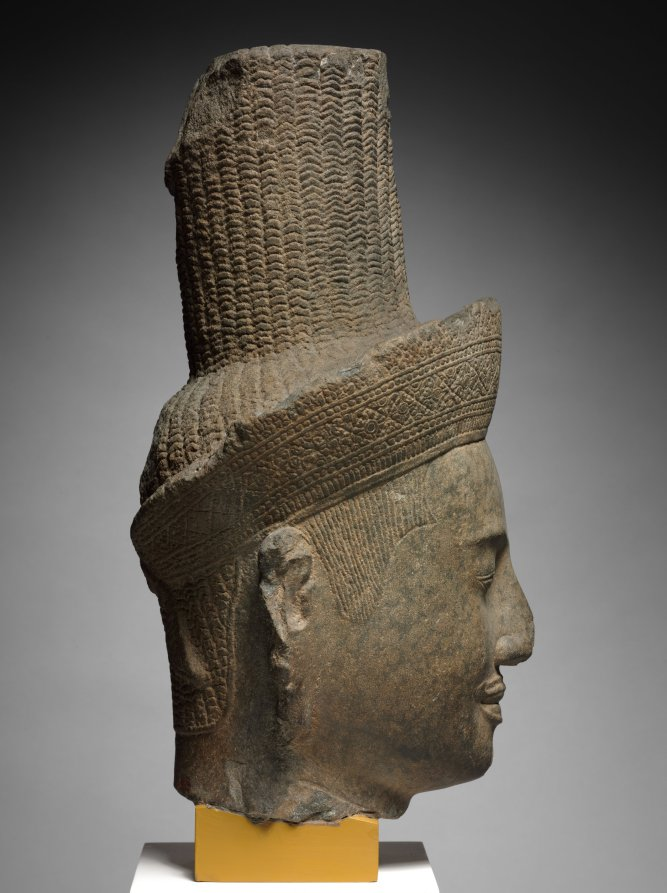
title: Head of Shiva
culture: Cambodia, Angkor, 12th century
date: 1100s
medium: sandstone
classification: Sculpture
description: Khmer patrons and artists produced works of art that could depict either a deified king or a god who has royal attributes. The Khmer cult of the god-king allowed for such fluidity of interpretation. Presence of a third eye in the forehead and matted locks of hair are attributes both of the Hindu god Shiva and the followers who emulated him in order to get closer to him.